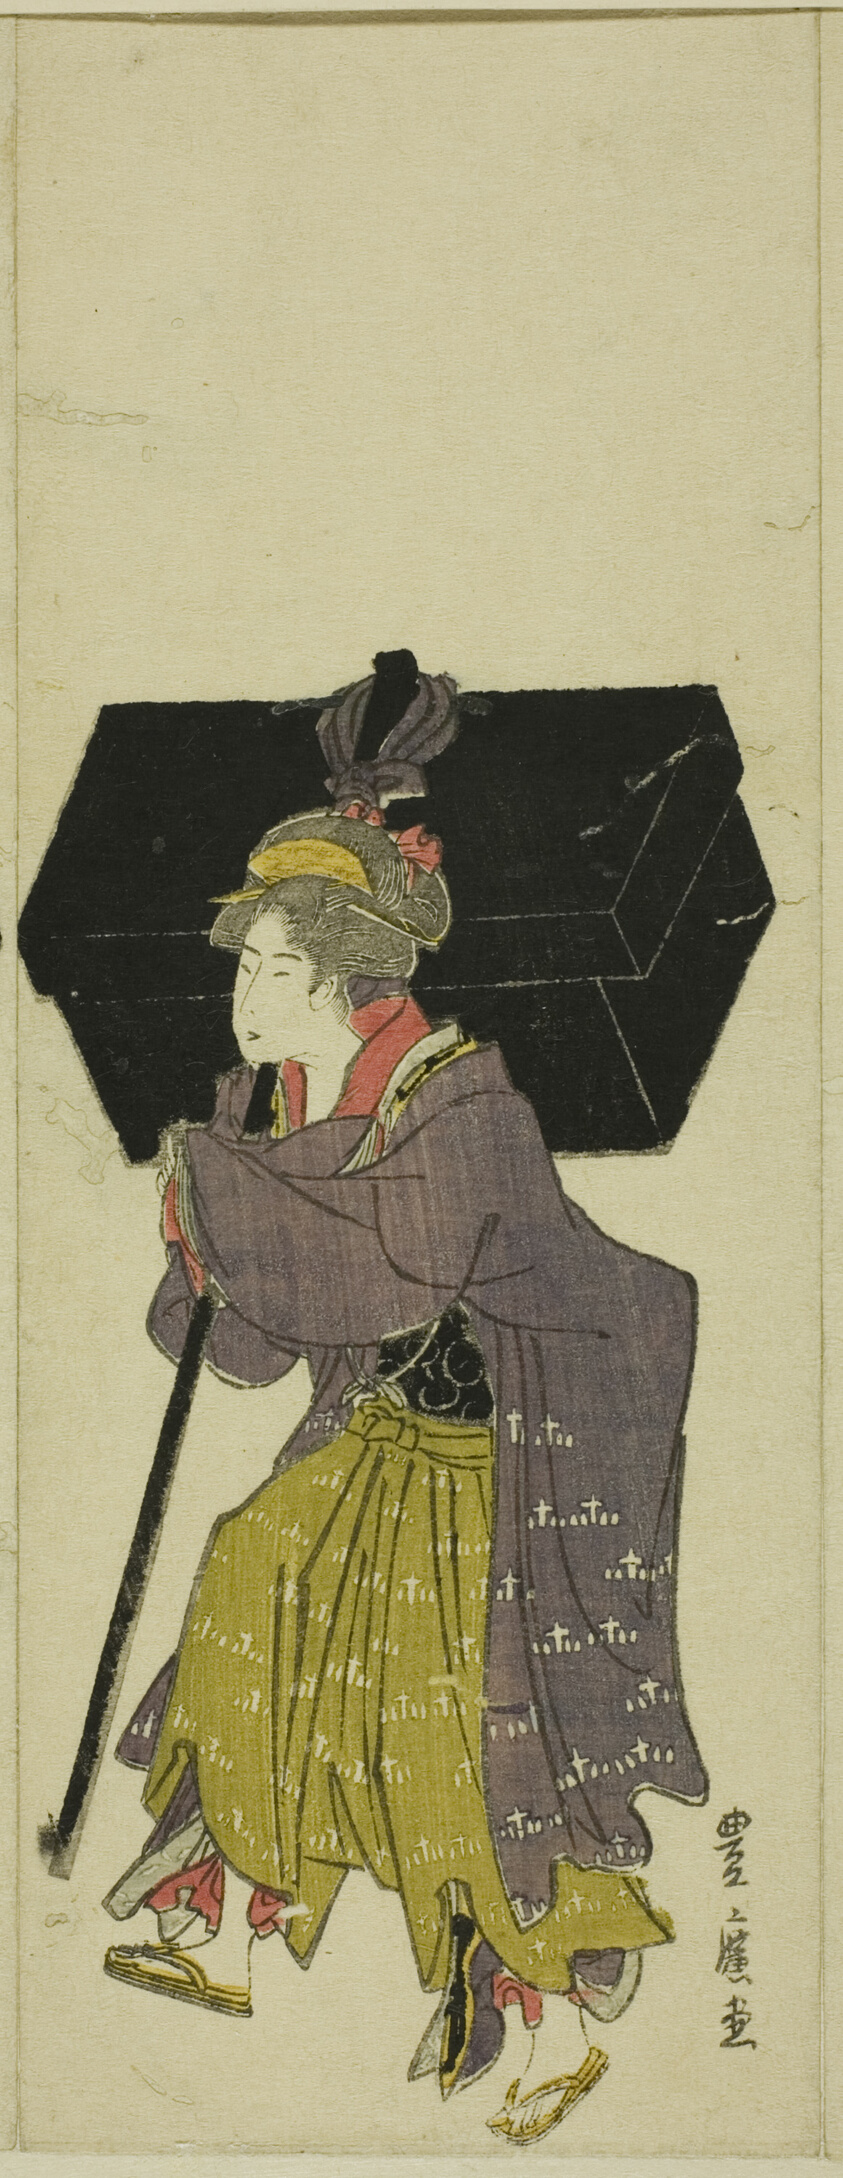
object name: Print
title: Parody of a daimyo procession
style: Japanese (culture or style)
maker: Utagawa Toyohiro (Japanese, 1773-1828)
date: c. 1805/07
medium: Color woodblock print; 1 of 12 sheets (see 1928.391-402)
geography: Japan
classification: woodblock print; print